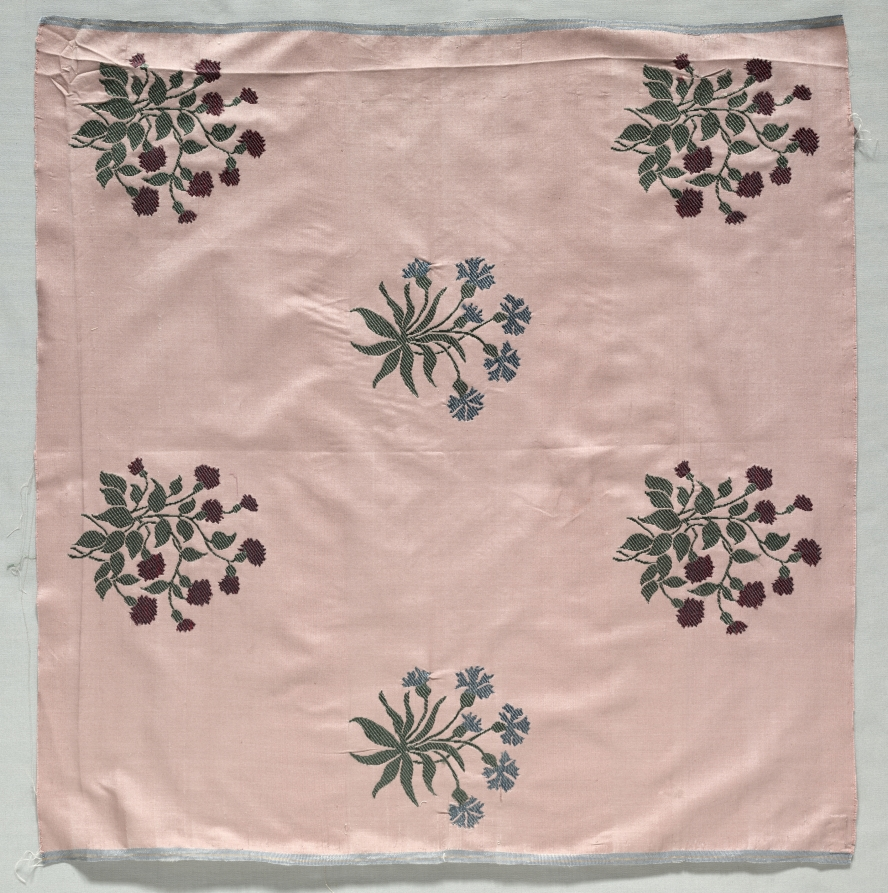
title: Brocaded Silk Textile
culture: Italy, early 20th century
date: 1900–1930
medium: brocade, silk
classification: Textile